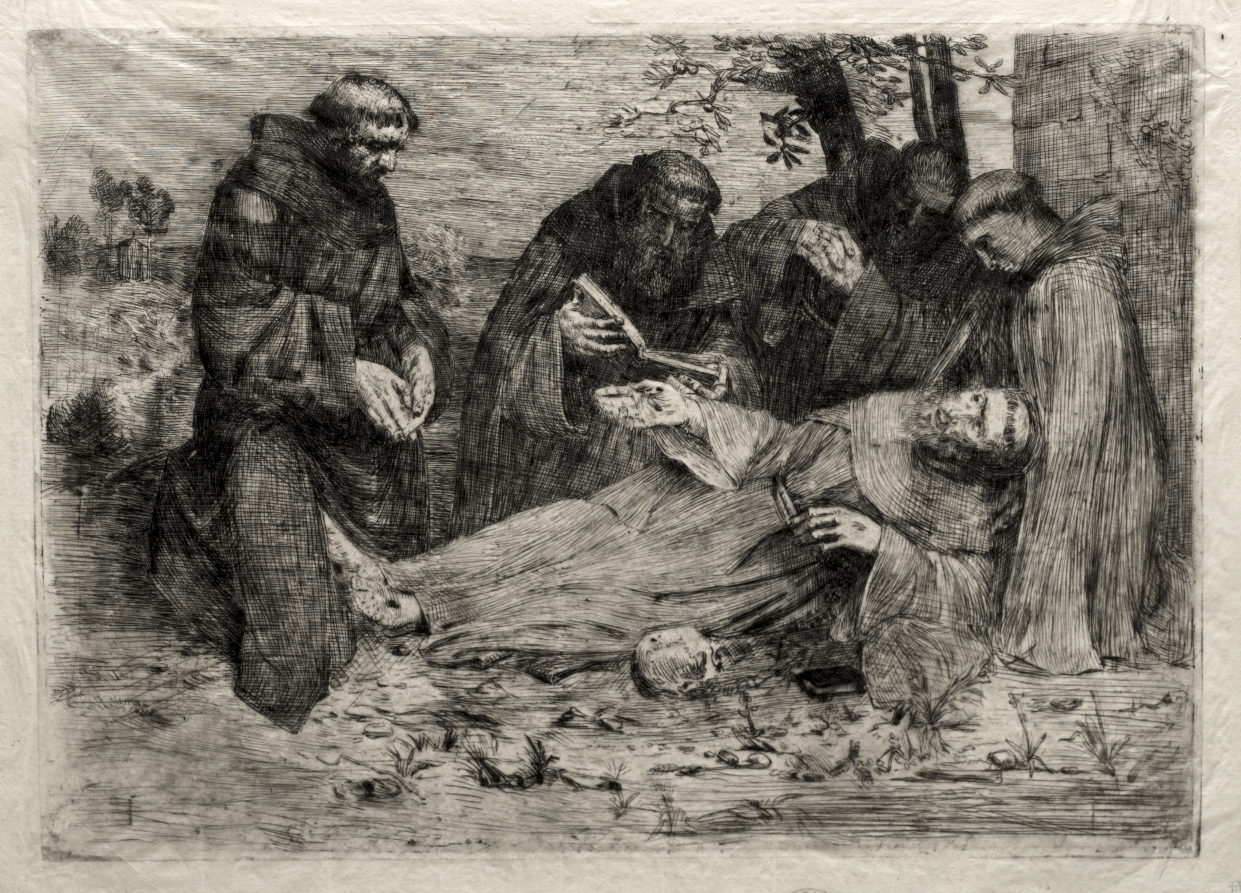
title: The Death of St. Francis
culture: France, 19th century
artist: Alphonse Legros (French, 1837–1911)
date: c. 1857–1911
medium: etching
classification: Print